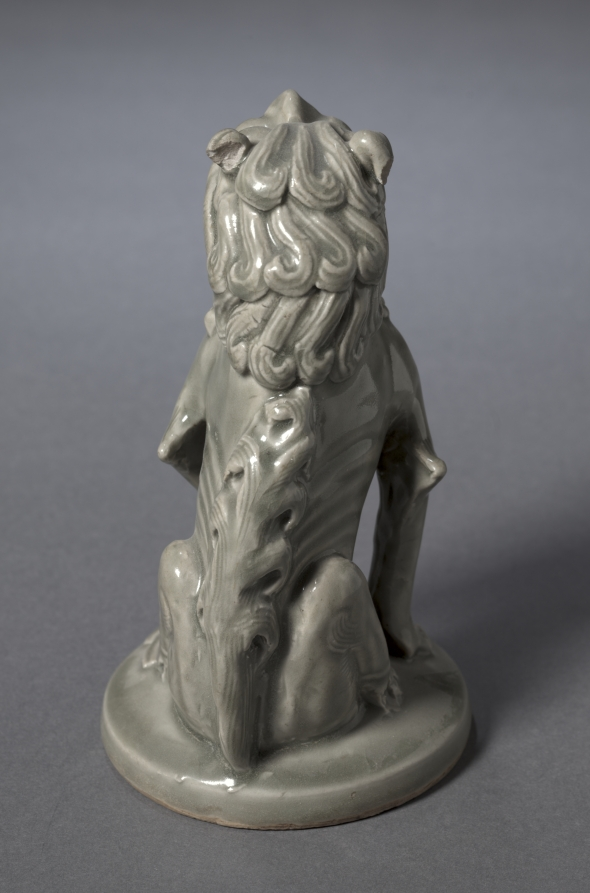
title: Incense Burner Top in the Shape of a Lion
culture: China, Shaanxi province, Northern Song dynasty (960-1127)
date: 1100s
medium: green-glazed porcelaneous stoneware, Yaozhou ware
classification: Ceramic